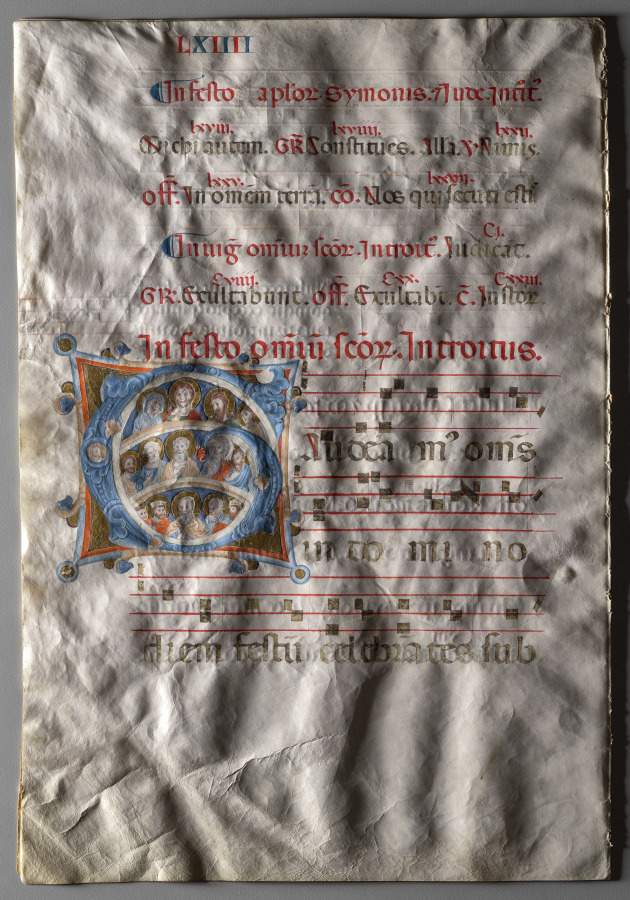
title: Bifolio from a Gradual: Initial (G) with Christ, the Virgin, and Apostles and Initial (O) (recto)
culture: Italy, Siena(?)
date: c. 1300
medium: Ink, tempera, and gold on vellum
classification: Manuscript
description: The large decorated initial G introduces the text, Gaudeamus omnes in Domino (Let us rejoice in the Lord). It is the beginning of the opening prayer, or introit, of the Mass for the Feast of All Saints (November 1). The figures within the initial include Christ, the Virgin Mary, and various saints.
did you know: Words written in red ink, called rubrics, indicate titles and chapter headings that are not part of a manuscript’s main text.